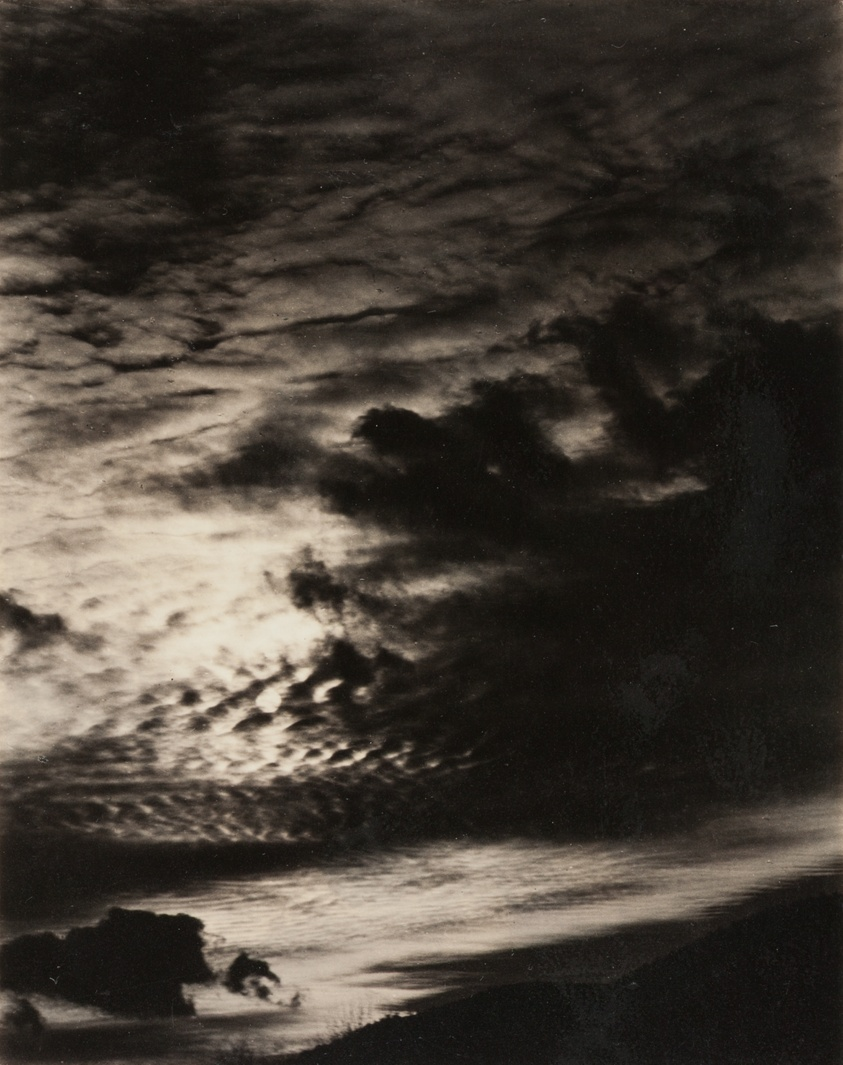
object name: Photograph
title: Equivalent, from Set A (Third Set, Print 1)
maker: Alfred Stieglitz (American, 1864–1946)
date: 1929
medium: Gelatin silver print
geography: United States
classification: gelatin silver (developing-out-paper) pr; photographic process; photography; photograph